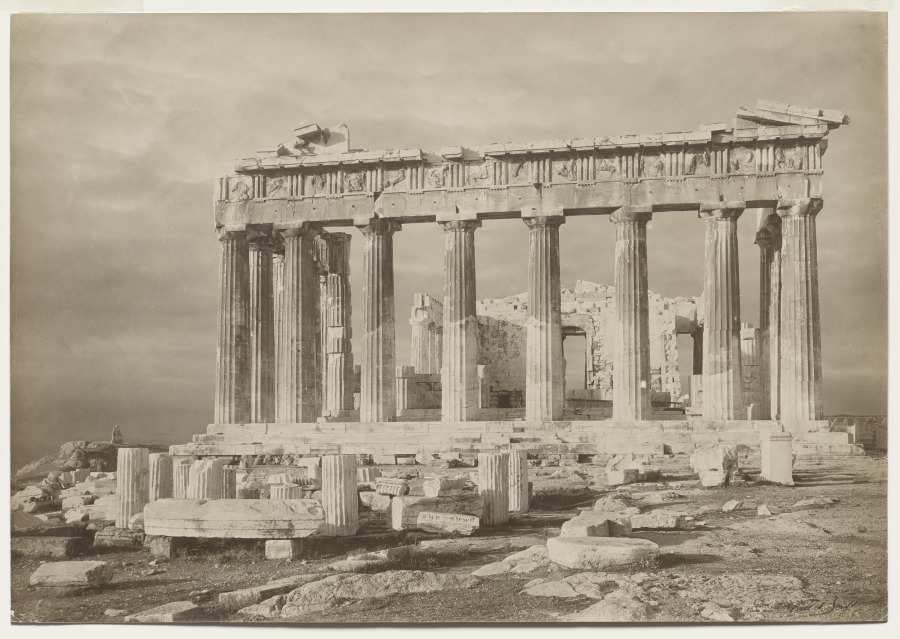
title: The Parthenon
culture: France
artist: Frédéric Boissonnas (Swiss, 1858–1944)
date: c. 1907–20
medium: mammoth carbon print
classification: Photograph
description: Originally dedicated to the ancient Greek goddess Athena, this building—which still stands today—was completed in 438 B.C. Frédéric Boissonas was a Swiss photographer who amassed enough images on several trips to Greece to publish 14 photo albums on its landscape and archeological sites. The Greek government used his images to attract tourists and raise the country’s image abroad.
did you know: In the early Middle Ages, this Greek temple became a church and in the 1400s, a mosque.